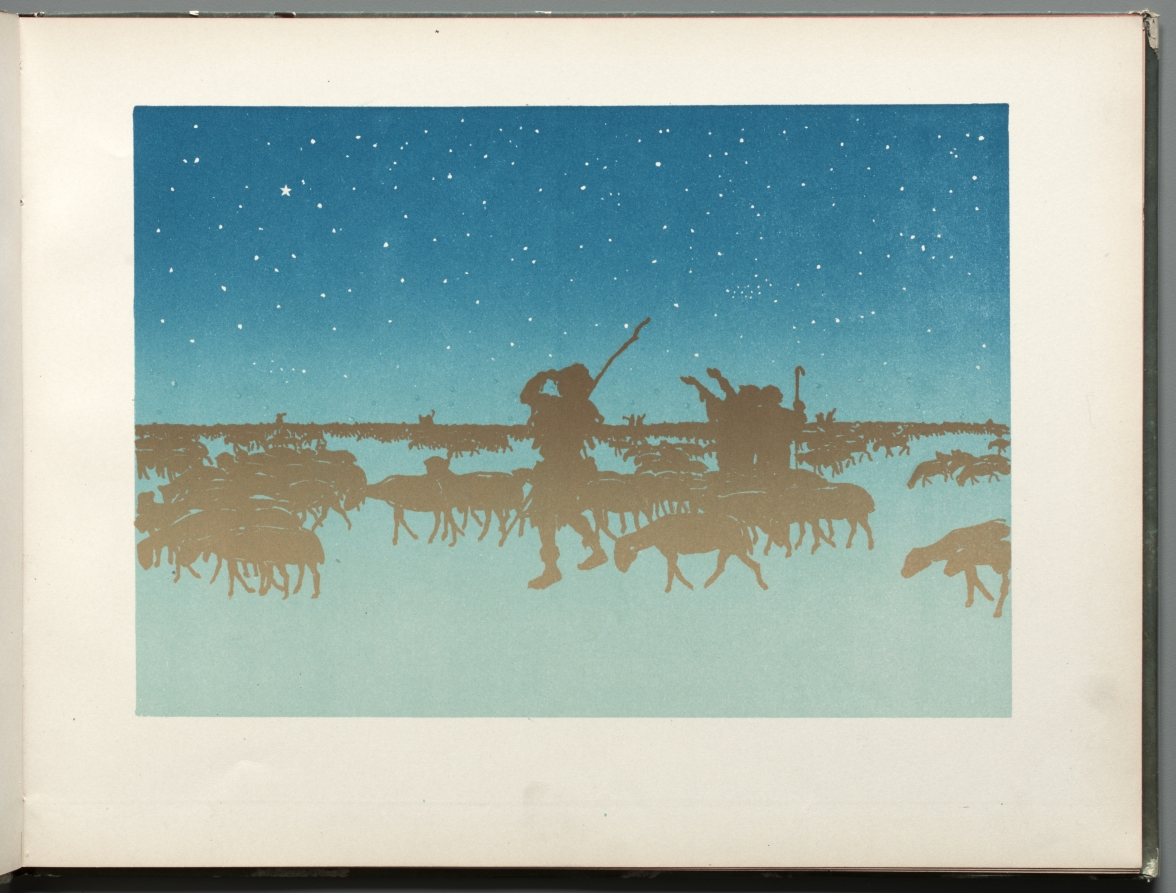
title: The Progress of the Stars: Les Bergers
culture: France, 19th century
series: Bound Volume illustrating the poetry and music of Georges Fragerolle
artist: Henri Rivière (French, 1864–1951)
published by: C. Marpon & Flammarion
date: 1890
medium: 18 color lithographs in a Bound Volume illustrating the poetry and music of Georges Fragerolle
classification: Bound Volume